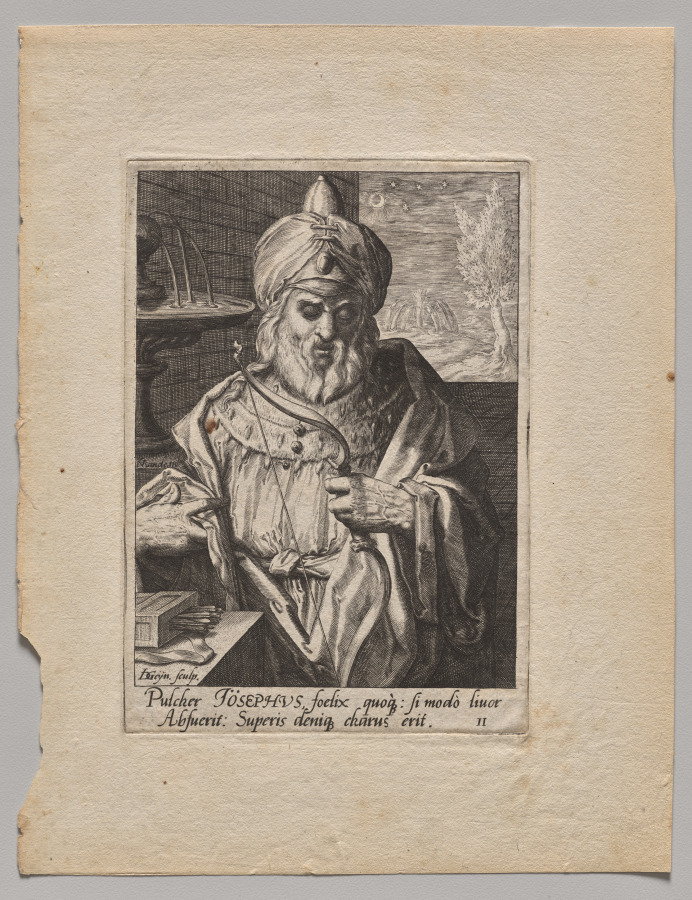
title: Plate 11: Joseph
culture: Netherlands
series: The Twelve Sons of Jacob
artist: Jacob de Gheyn II (Netherlandish, 1565–1629)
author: after Karel I van Mander (Netherlandish, 1548–1606)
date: c. 1589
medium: engraving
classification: Print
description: In this print, the biblical figure Joseph holds a bow next to a quiver of arrows, symbolizing God’s deliverance and protection of Joseph and his people. This is one of a series of prints depicting the twelve sons of Jacob, each with an attribute and costume that denotes his character. According to the Old Testament, Jacob blessed each of his twelve sons, prophesizing the destiny of their tribe, and assigning them a parcel of land in Canaan. The print series was made in the Netherlands in the late 16th century, a time of political struggle when Old Testament heroes were popular exemplars of fortitude and patience.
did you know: The abundantly flowing fountain in this image may refer to Jacob’s blessing to his son Joseph that he would enjoy a double portion of inheritance.